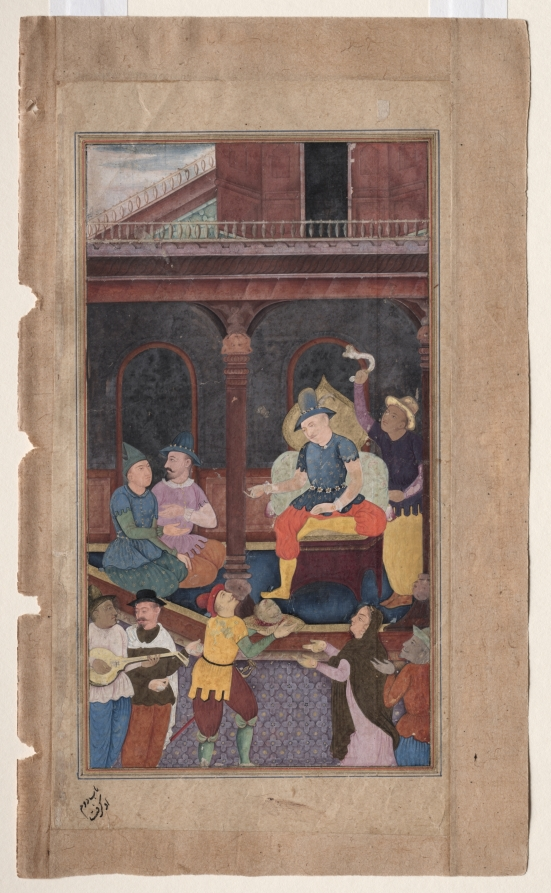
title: Salome Receiving John the Baptist’s Head on a Platter (folio 112 verso), from a Mirror of Holiness (Mir’at al-quds) of Father Jerome Xavier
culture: Mughal India, Allahabad, made for Prince Salim (1569–1627)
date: 1602–4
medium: Gum tempera, ink, color, and gold on paper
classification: Manuscript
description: Herod, King of Judea, sits on a Mughal-style throne as his wife’s daughter Salome reaches for the freshly severed head of John the Baptist. John had offended Herod’s wife, so she took revenge by having her daughter seduce Herod into granting her this wish. Salome is depicted modestly in this painting, and the court musician at the lower left looks on in disgust. The lion head capitals on the pillars above Herod are upside down, seemingly in disapproval of the debauched king.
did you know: Column capitals in Herod’s palace have angels seated on upside-down lion heads.